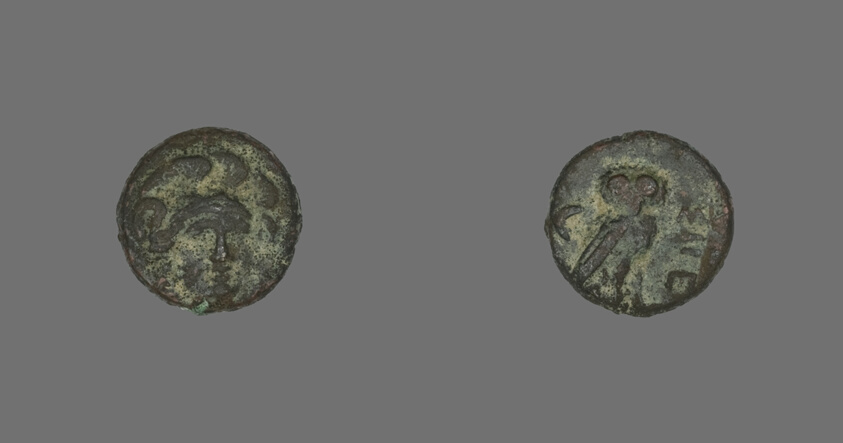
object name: Coin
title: Coin Depicting the Goddess Athena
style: greek, ancient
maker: Greek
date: 4th century BCE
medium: Bronze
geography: Ancient Greece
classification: coin; ancient art